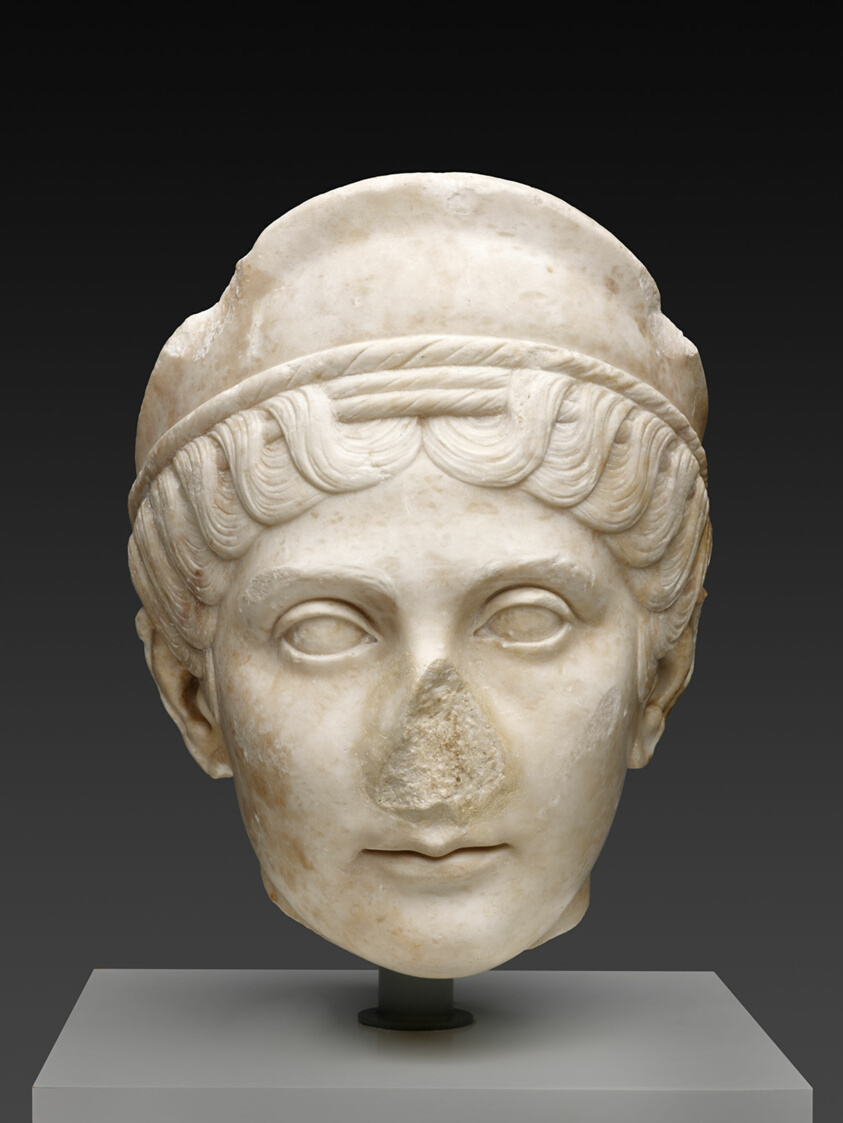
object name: Sculpture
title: Portrait Head of a Woman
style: roman (ancient, style or period), ancient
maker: Roman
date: 117-30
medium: Marble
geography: Italy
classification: marble; stone; sculpture; ancient art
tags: portraits